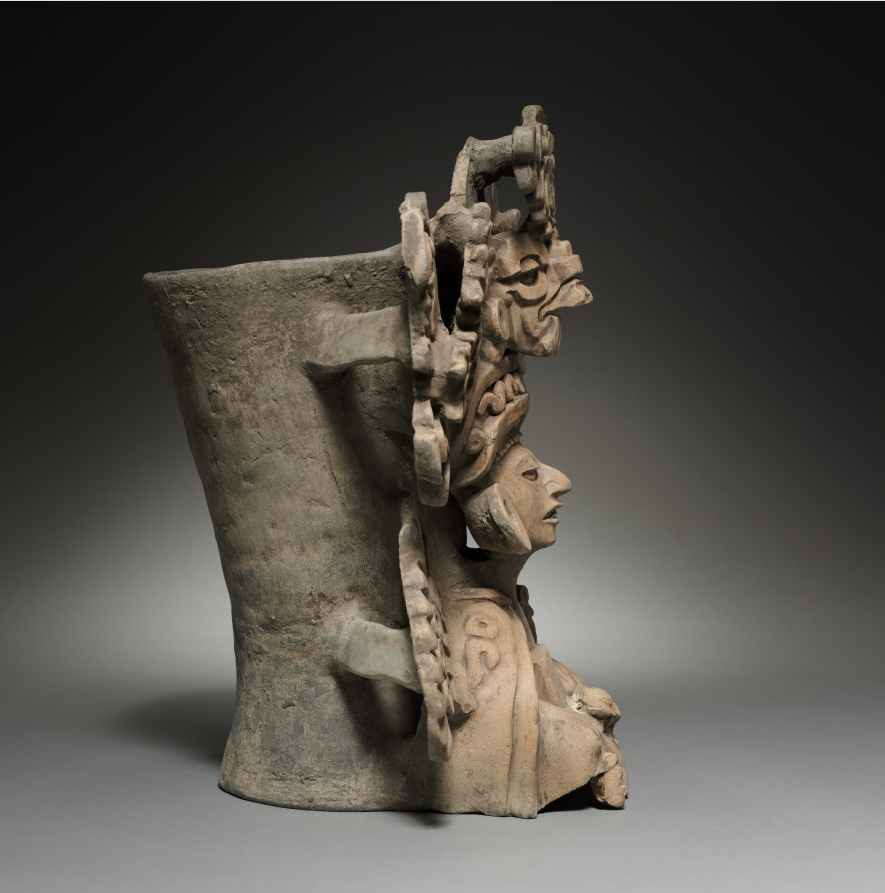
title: Funerary Urn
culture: Mexico, Oaxaca, Zapotec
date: 350–500 CE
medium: terracotta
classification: Sculpture